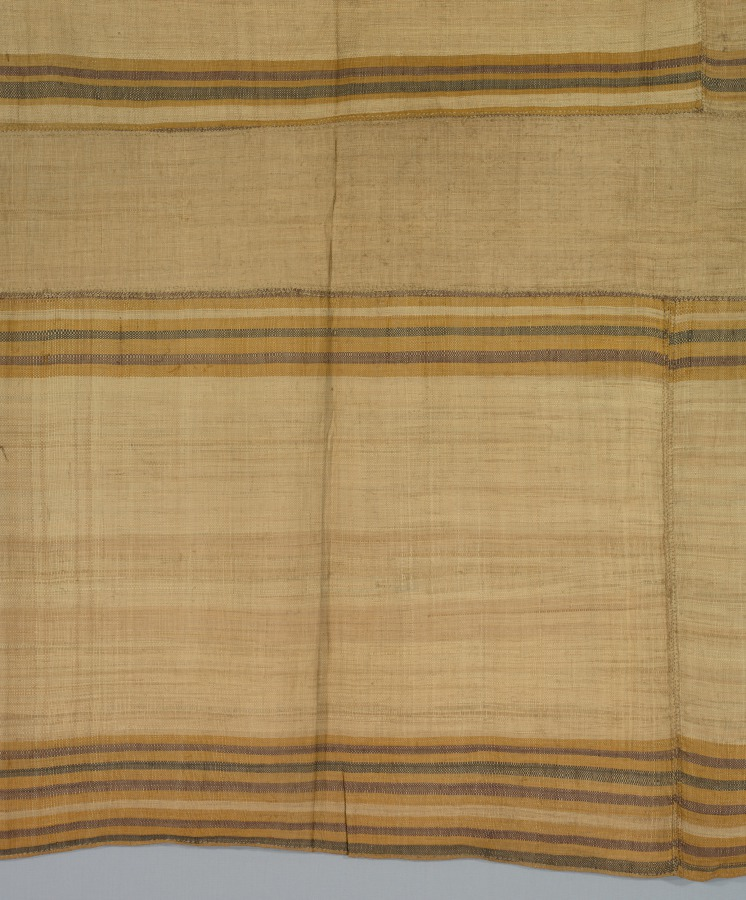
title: Cloth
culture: Africa, Central Africa, probably Democratic Republic of Congo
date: before 1921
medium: Raffia and dye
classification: Textile